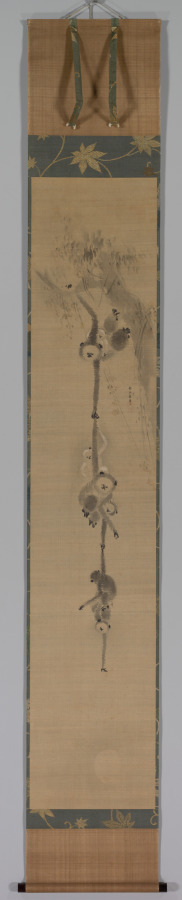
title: Gibbons Reaching for the Moon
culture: Japan, Edo period (1615–1868)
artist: Kano Tan’yū (Japanese, 1602–1674)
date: 1600s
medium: Hanging scroll; ink and light color on silk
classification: Painting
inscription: signed: "Tan'yūsai hitsu"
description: Long-armed gibbons form a chain to reach down from a tree, hoping to touch what they believe is the moon. In fact, the orb remaining beyond their grasp is the full moon’s reflection in the still surface of a pond or lake. The image is a common metaphor for the deluded mind in Buddhist thought. Gibbons do not live in Japan but were known to Japanese painters of the premodern era through paintings brought from China.